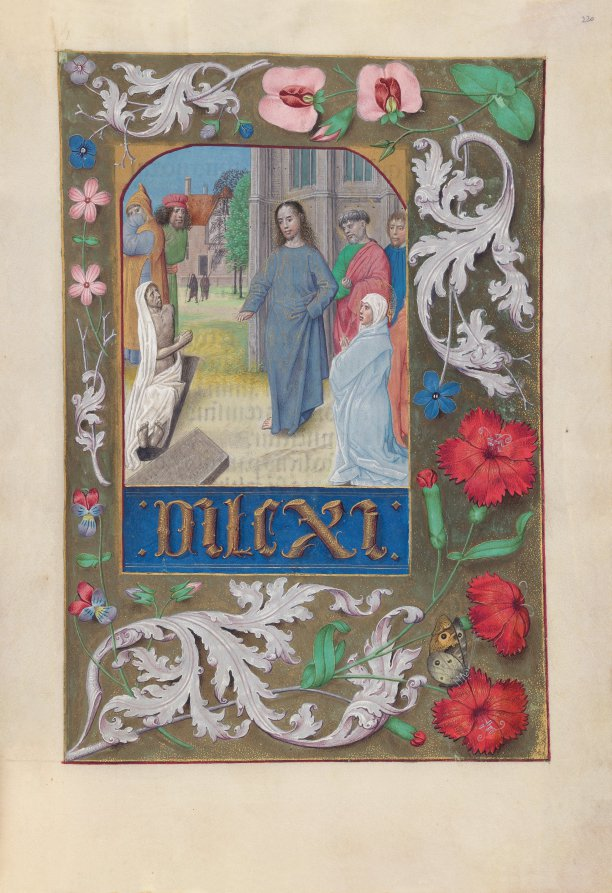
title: Hours of Queen Isabella the Catholic, Queen of Spain: Fol. 220r, Raising of Lazarus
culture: Flanders, Ghent and Bruges, late 15th century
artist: Master of the First Prayerbook of Maximillian (Flemish, c. 1444–1519)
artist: and Associates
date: c. 1500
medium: ink, tempera, and gold on vellum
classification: Bound Volume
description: This manuscript was illuminated by a circle of at least five highly organized manuscript painters active in the Flemish cities of Ghent and Bruges. The principal illuminator was Alexander Bening, who painted the majority of the book's miniatures. Manuscripts produced by this circle of artists are renowned for the decoration of their borders, which typically feature a rich variety of realistically-painted flowers, birds, and butterflies. This prayer book, called a book of hours, was intended not for a cleric, but for the private devotions of a lay person-in this case, Isabella the Catholic, Queen of Spain (1451-1504). Isabella's coat of arms embellishes the book's frontispiece. It is unlikely that the book was commissioned by the Queen herself; rather, she probably received it as a diplomatic gift from someone courting her patronage, perhaps Cardinal Francisco Jimenez de Cisneros. A Franciscan friar, Jimenez was dependent upon Isabella for his advancement, first to the post of Queen's confessor in 1492, and then to Archbishop of Toledo in 1495.